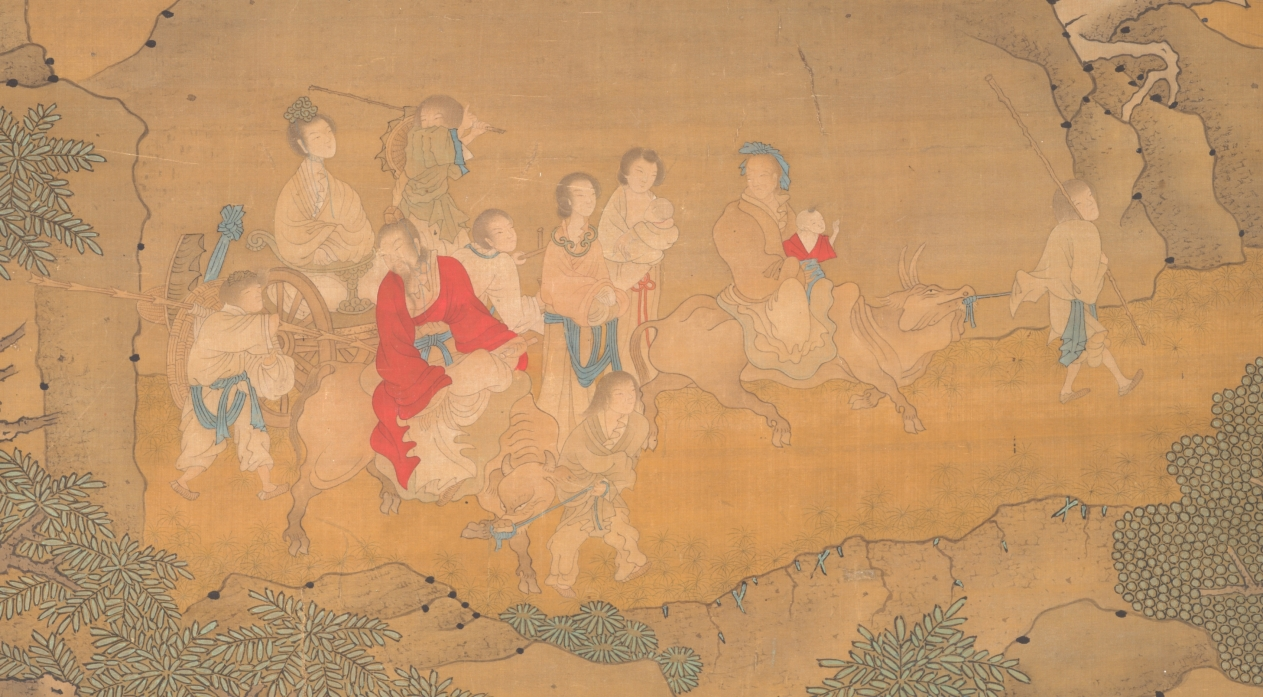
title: Xu Jingyang Moving His Family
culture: China, Ming dynasty (1368–1644)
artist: Cui Zizhong (Chinese, 1574–1644)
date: 1644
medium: Hanging scroll; ink and color on silk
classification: Painting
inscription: Artist's 2 seals: Pei-hai, Cui Zizhong yin.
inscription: 9 additional seals: 2 of Xiang Yuan (18th-19th c.); 1 of Tang Zuomei (late 18th-19th c.); 1 of Zhang Heng 張珩 (1915-1963); 1 of C. C. Wang 王季遷 (1907–2003); 4 unidentified.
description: Xu Jingyang was a dedicated fourth-century Confucian official who allegedly turned into a Daoist immortal. This scroll depicts the legend that when he attained immortality, he took his entire household, including chickens and dogs, to paradise. Cui Zizhong’s painting style intentionally referenced ancient masters. Typical of the pre-Song dynasty landscape tradition, there is the use of blue and green colors and an emphasis on outline rather than texture. While the trembling outlines are reminiscent of earlier painters, the flickering light on rocks and trees is a stylistic feature of Cui’s own time.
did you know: Xu Jingyang, wearing red, is in the upper register of figures, while below his servants transport a rooster, dog, and other supplies.